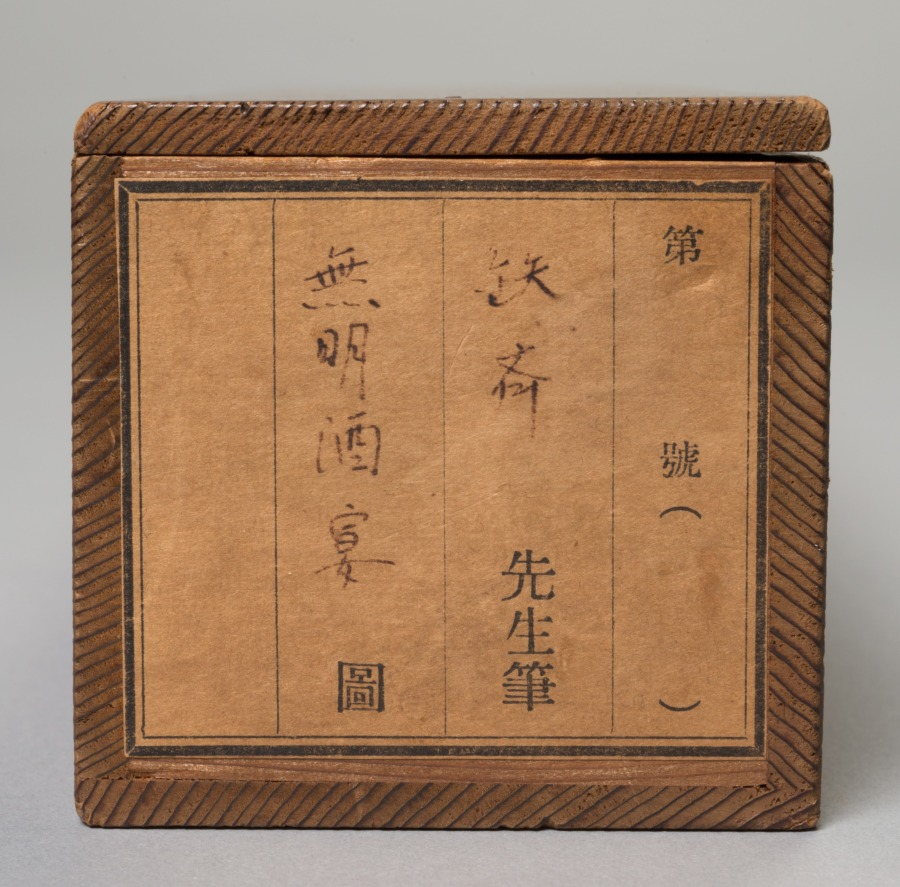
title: Sake Party with No Light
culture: Japan, Meiji period (1868–1912) to Taishō period (1912–26)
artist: Tomioka Tessai (Japanese, 1836–1924)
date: late 1800s–early 1900s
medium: hanging scroll; ink on paper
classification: Painting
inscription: Artist's signature and seal at left side; title at top left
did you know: Three skeletons are holding cups and passing around a bottle of sake.